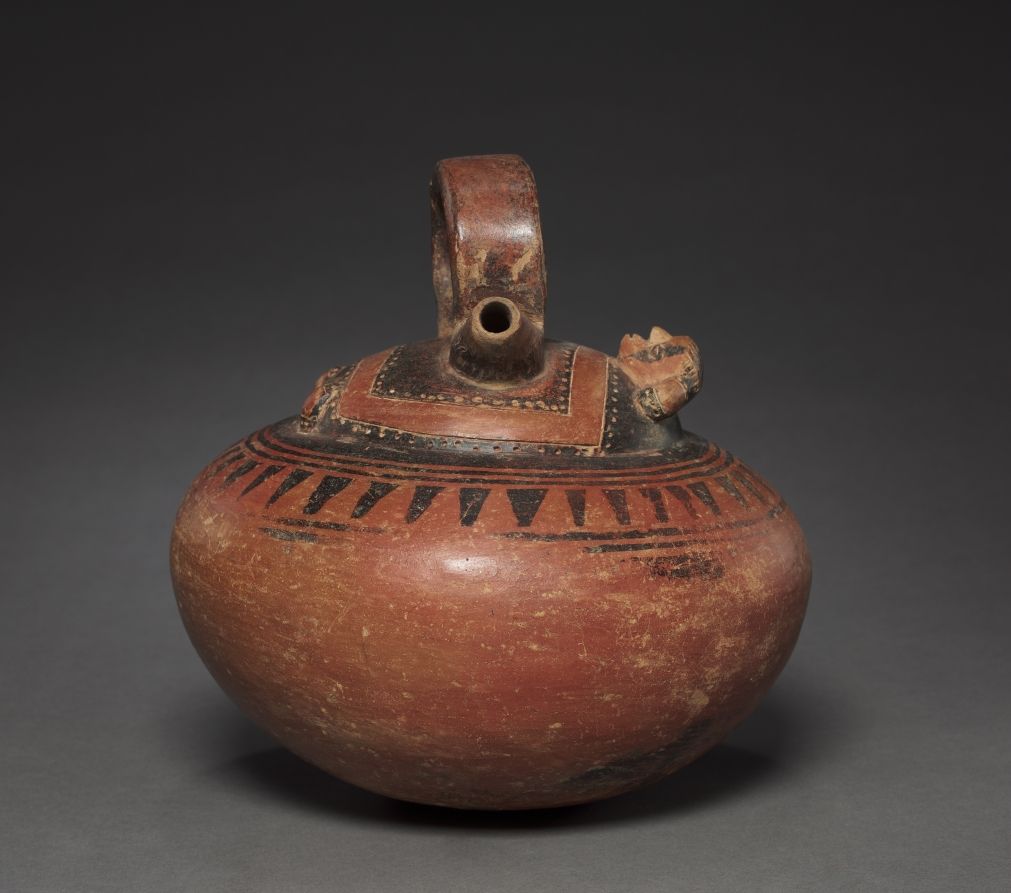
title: Double-Spouted Vessel with Reclining Figure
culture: Colombia, Calima region, Yotoco style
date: c. 1–800 CE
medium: ceramic, slip, resist paint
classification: Ceramic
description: This headdress ornament reveals a considerable flair for showmanship through its size and many suspended parts, which would have swayed and glittered with the wearer's motion. Like many other Yotoco ornaments, it features an enigmatic human face with closed eyes, a huge nose ornament that hides the lower face, and great disks that dangle from the ears.